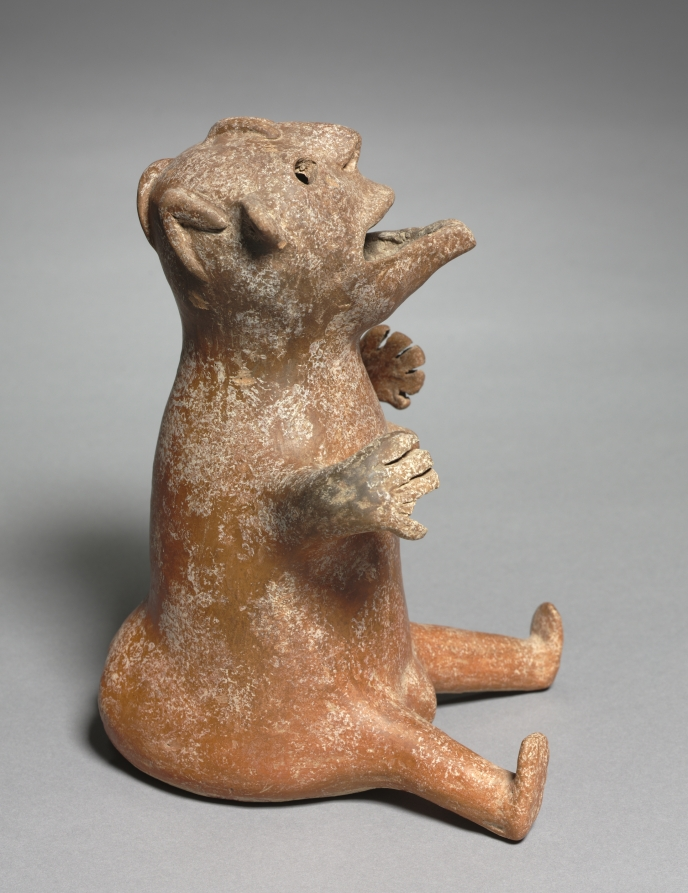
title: "Bear-Woman" Vessel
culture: Iran, Marlik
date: c. 1200–1000 BCE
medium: ceramic, earthenware, burnished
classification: Ceramic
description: The sexual features of this creature have been emphasized so as to guarantee fertility to the woman who drank from it.